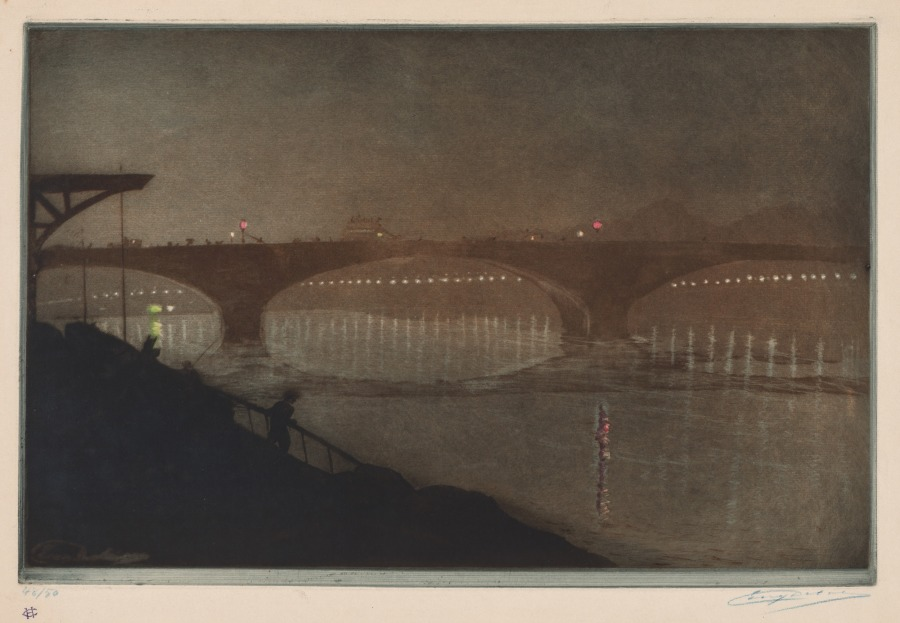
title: The Solferino Bridge: Nocturnal Effect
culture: France, 19th century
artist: Eugène Delâtre (French, 1864–1938)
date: c.1898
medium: color aquatint and etching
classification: Print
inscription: lower left, in blue pencil: 48/50; right: Eug Delatre; lower edge, in graphite: Le Pont Solferino